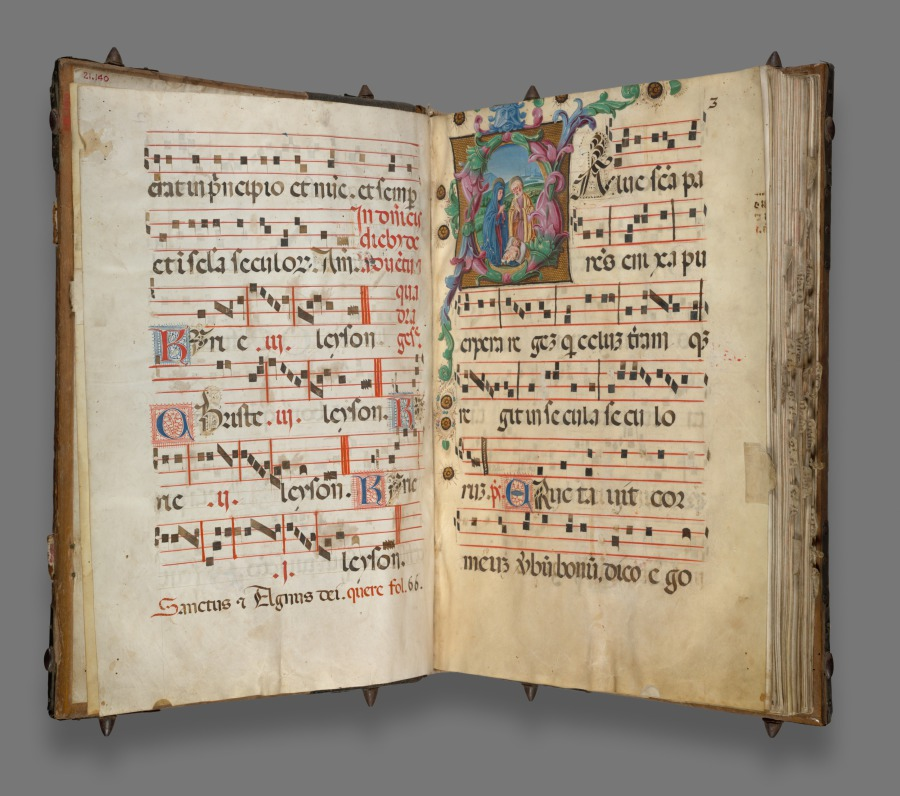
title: Gradual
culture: Italy, Verona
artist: circle of Girolamo dai Libri (Italian, 1474–1555)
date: c. 1520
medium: ink, tempera, and gold on parchment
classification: Manuscript